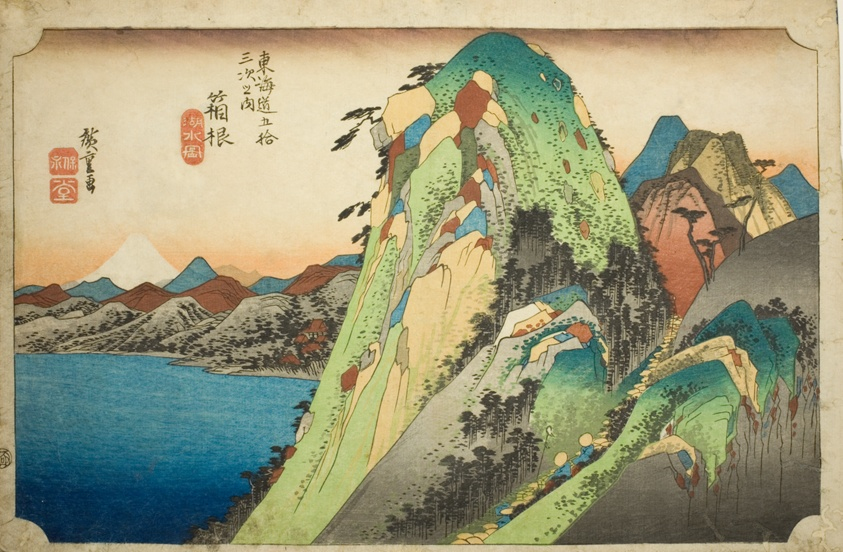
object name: Print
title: Hakone: View of the Lake (Hakone, kosui no zu), from the series "Fifty-three Stations of the Tokaido Road (Tokaido gojusan tsugi no uchi)," also known as the Hoeido Tokaido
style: Japanese (culture or style)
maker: Utagawa Hiroshige 歌川 広重; Japanese, 1797-1858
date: c. 1833/34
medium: Color woodblock print; oban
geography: Japan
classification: woodblock print; print; asian art